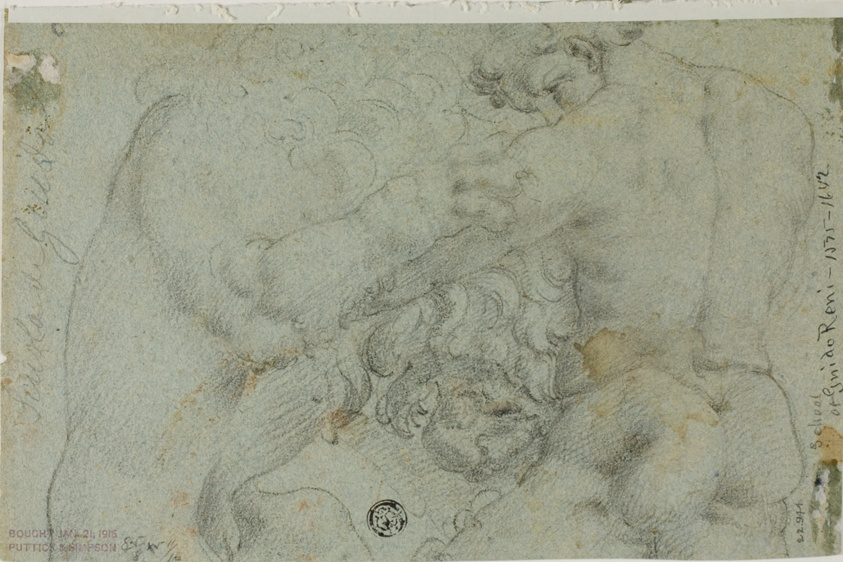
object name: Drawing and Watercolor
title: Angel Annunciate (recto); Samson and the Lion (verso)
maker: School of Guido Reni (Italian, 1575-1642)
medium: Black chalk, heightened with traces of white chalk (recto), and blach chalk (verso), on blue laid paper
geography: Italy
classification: drawings (visual works); prints and drawing